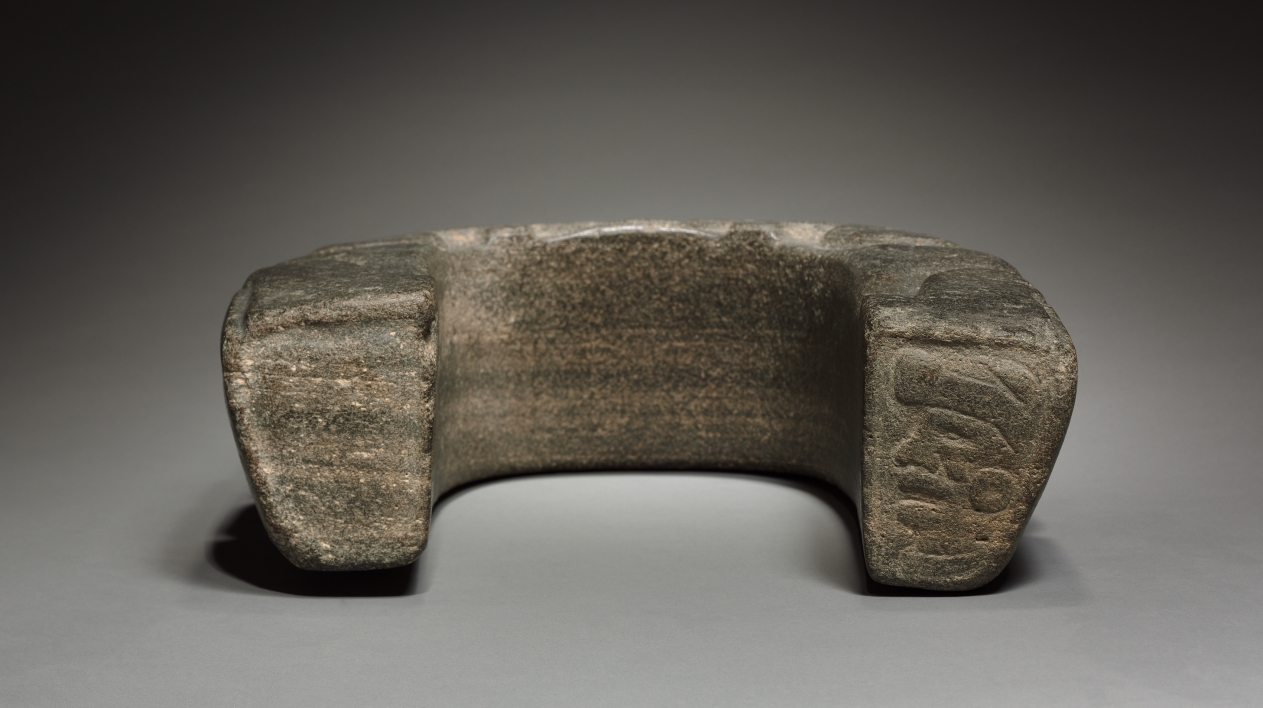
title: Unfinished Yoke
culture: Mexico, Central Veracruz, Classsic Veracruz style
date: 600–900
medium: gray stone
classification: Sculpture